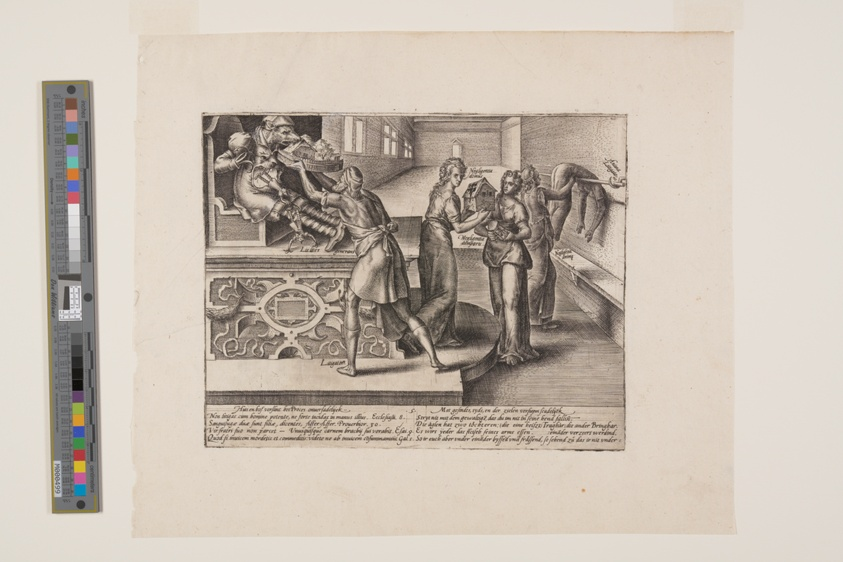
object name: Print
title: The Expense of Litigation, from Litis Abusus (The Abuses of the Law)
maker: Hendrick Goltzius (Dutch, 1558–1617)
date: c. 1576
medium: Engraving on ivory laid paper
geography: Netherlands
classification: print; paper; prints and drawing; engraving